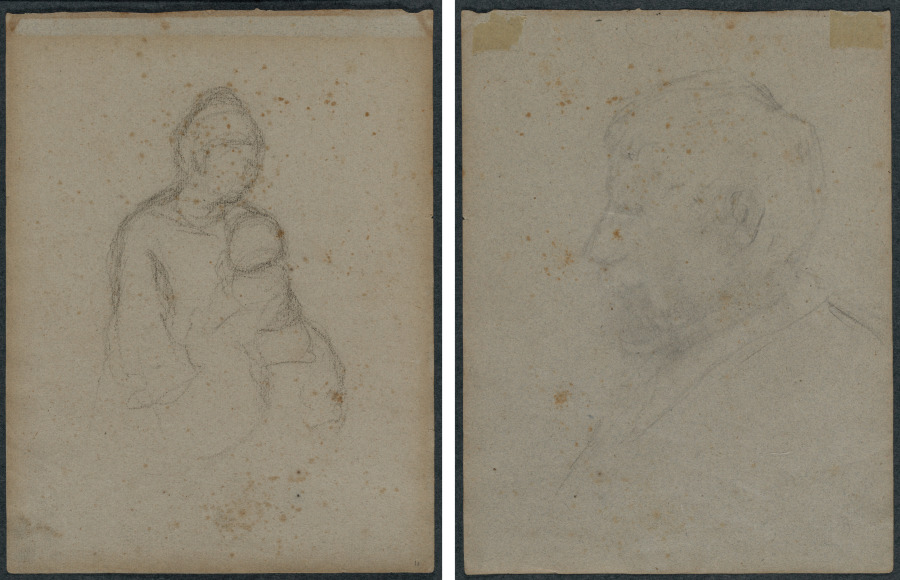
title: Mother and Child (recto); Profile Bust of a Man (verso)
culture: France, 19th century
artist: Paul Gauguin (French, 1848–1903)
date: 1870s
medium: black chalk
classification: Drawing